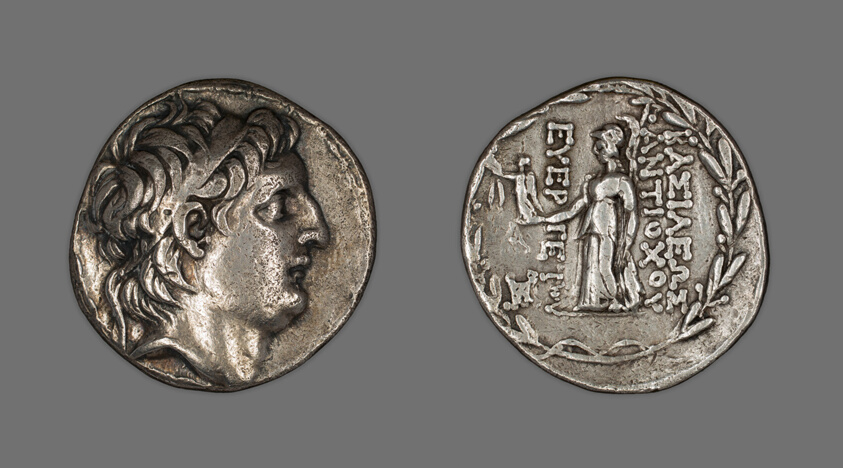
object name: Coin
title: Tetradrachm (Coin) Portraying King Antiochus VII Euergetes Sidetes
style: hellenistic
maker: Greek; probably minted in Antioch (near modern Antakya, Turkey)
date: 138-129 BCE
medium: Silver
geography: Ancient Near East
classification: coin; ancient art